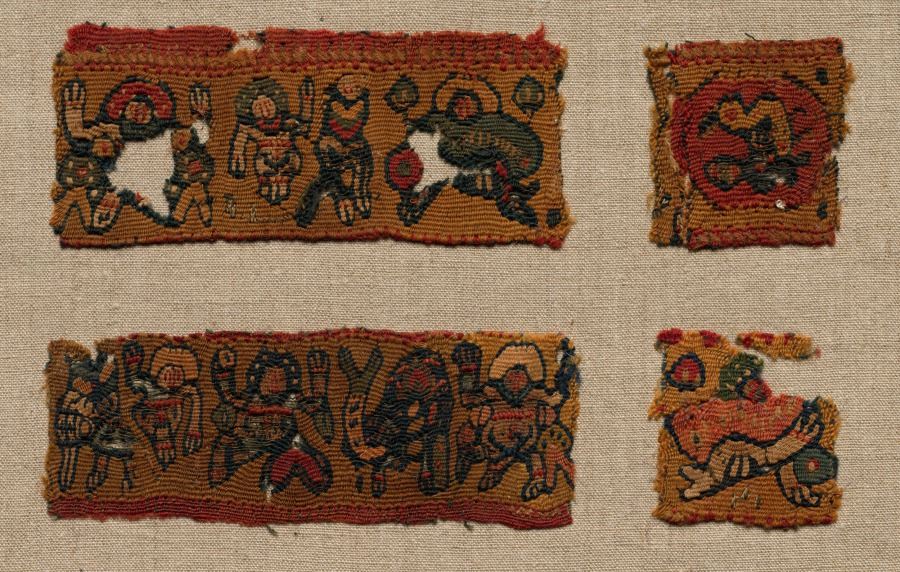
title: Four Fragments of the Gammadion Border of a Tunic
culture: Egypt, Byzantine period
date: 400s - 600s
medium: tabby weave with inwoven tapestry ornament, linen and wool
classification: Textile